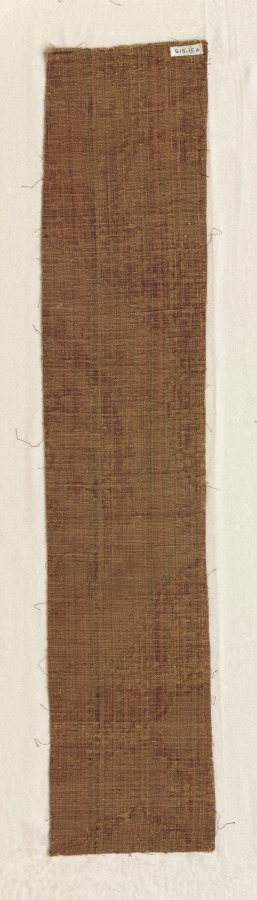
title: Fragments from Chasuble Front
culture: Italy, early 16th century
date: early 1500s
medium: velvet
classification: Velvet